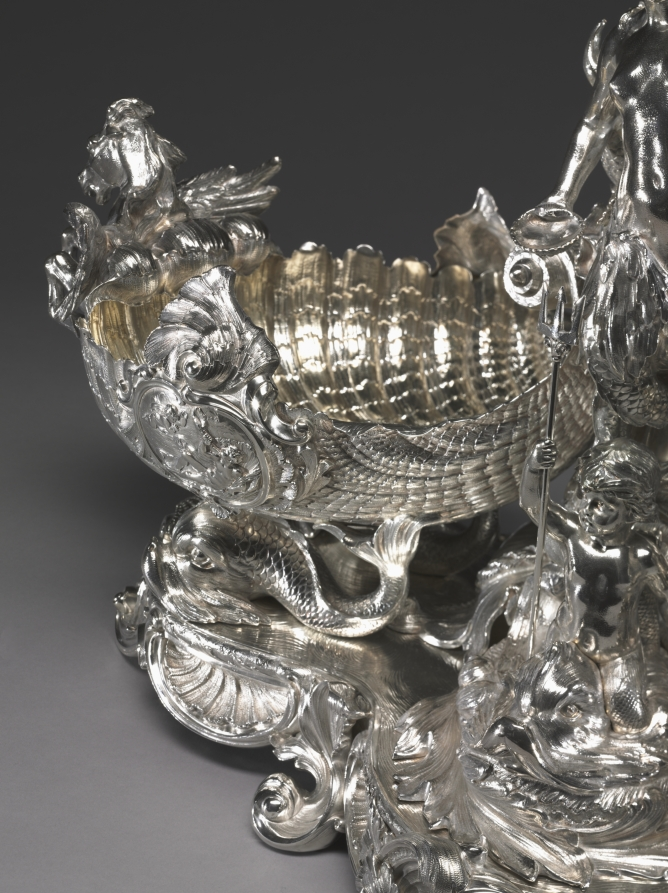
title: Centerpiece from the Nereid Service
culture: England, late 19th-early 20th century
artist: Goldsmith's & Silversmith's Company (British)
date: c. 1900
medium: silver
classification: Silver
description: Originally thought to have been made by the early 19th-century London silversmith Paul Storr because it had been marked with spurious Storr hallmarks, more recent scholarship has revealed that this service, representing the triumph of Great Britain on the high seas through the allegorical images of Grecian nymphs (nereids), was actually made to display at the 1900 world's fair in Paris. Such nationalistic fervor permeated design at the turn of the 20th century, especially in the years leading up to the First World War, when national pride was brought to its heels in Europe through a devastating conflict.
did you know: This centerpiece is actually the product of many hands since the Goldsmiths' and Silversmiths' Company operated as a cooperative of silversmiths who sold their work through the company.